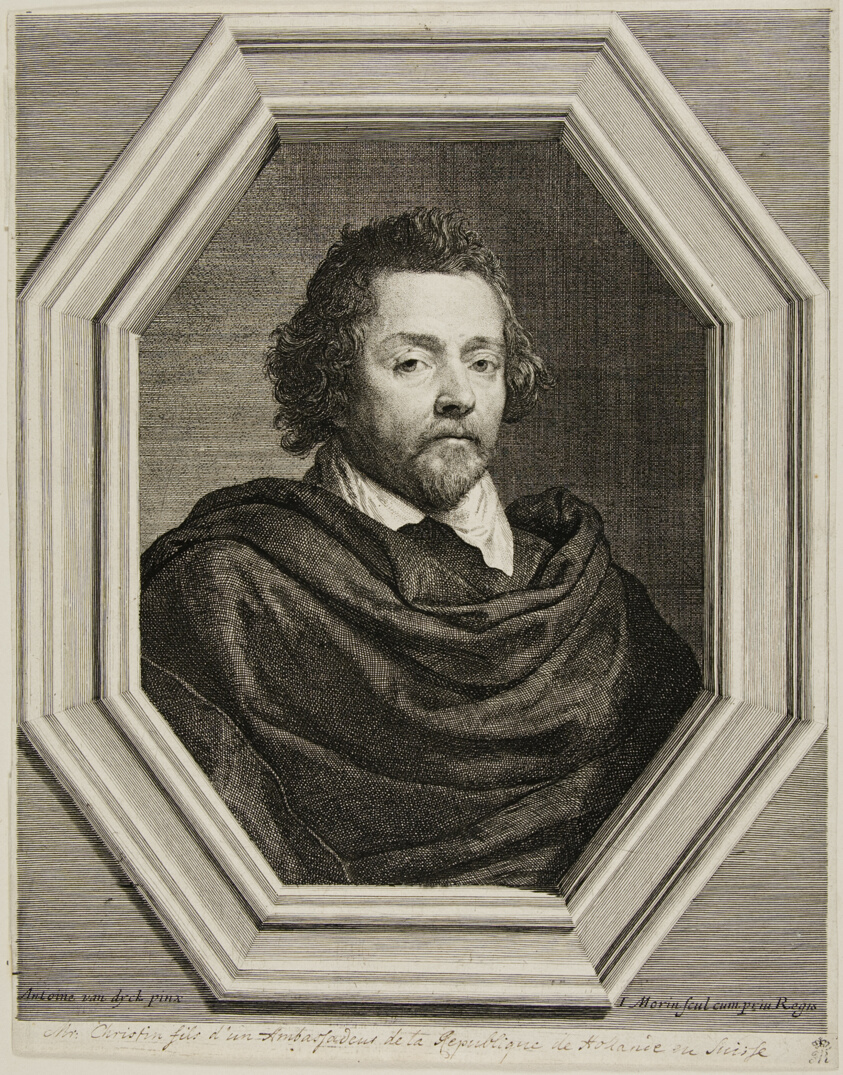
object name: Print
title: Nicolas Christin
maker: Jean Morin (French, c. 1590-1650); after Anthony van Dyck (Flemish, 1599-1641)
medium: Engraving and etching in black on paper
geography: France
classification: etching; print; prints and drawing